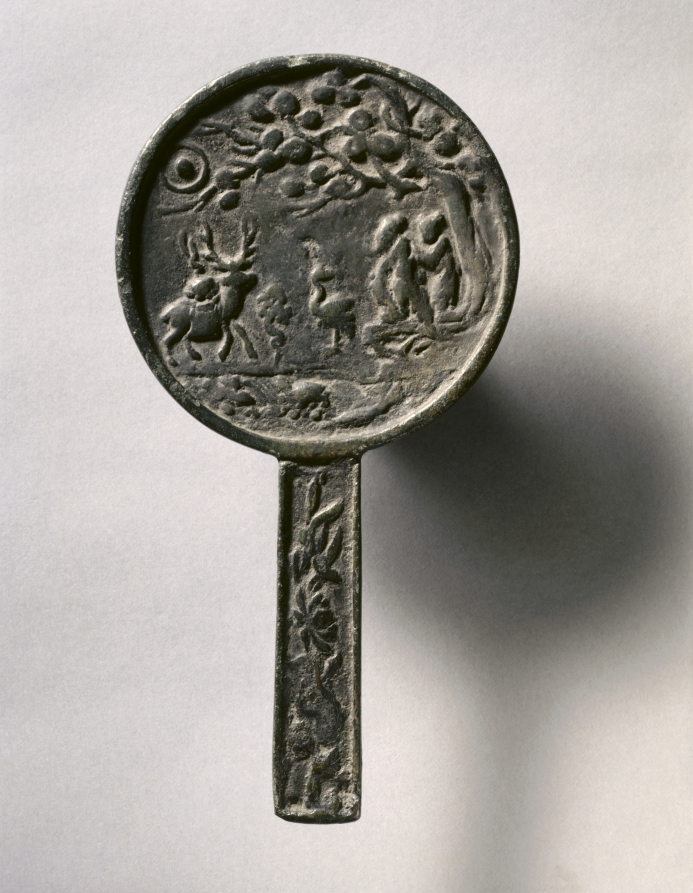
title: Narrative Mirror with Handle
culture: China, Jin dynasty (1115-1234) - Yuan dynasty (1271-1368)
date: early 12th Century - mid 14th Century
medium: bronze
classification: Metalwork